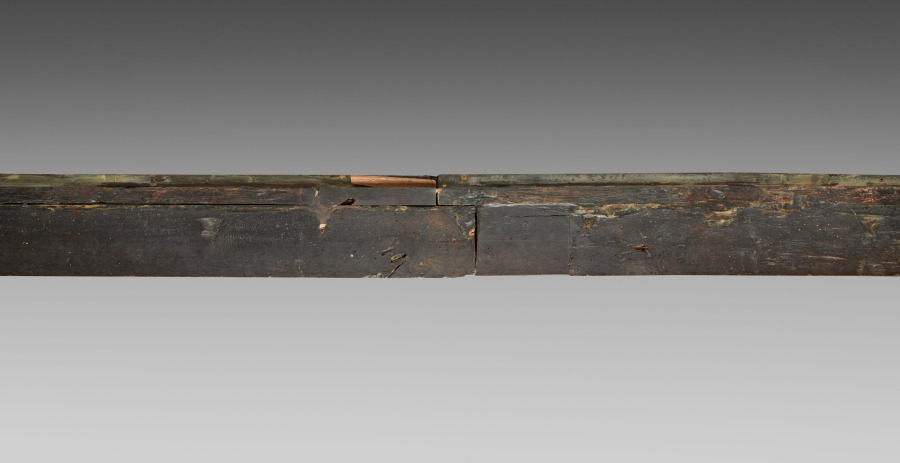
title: Upper Paneling from a Sacristy Armoire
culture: Italy, Florence, late 15th century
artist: attributed to Giuliano da Maiano (Italian, 1432–1490)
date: c. 1460–1475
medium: walnut, inlaid with holly and ebony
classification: Furniture and woodwork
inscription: in four of the five panels is the Medici badge of a jeweled ring wound with a ribbon or bannerole, on which is inscribed the motto "Semper." The frieze in the cornice contains part of a quotation from the Vulgate, Paul's epistle to the Romans, Chapter XI.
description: The imagery on the inset panels is the result of a technique known as intarsia, the skilled inlaying of woods of different colors to create a type of mosaic, popular during the 15th and 16th centuries in Italy for the decoration of paneling and furniture for studies, small rooms, and church sacristies. This large set of five intarsia panels comes from an unknown Florentine church. In its original setting the panels rested upon a row of similarly decorated cupboards (a sacristy armoire) which were used for the storage of liturgical vestments and books. This panel would have therefore been seen at eye level. The central panel depicts the Resurrection of Christ. The two outside panels depict the emblem of Lorenzo de Medici-three plumes encircled by a jeweled ring above a scrolling ribbon containing the Latin word SEMPER (Always). Lorenzo de Medici (1449-92) was the ruler of Florence when this sacristy armoire was constructed and was the likely patron. It seems to be the work of Giuliano da Maiano, an architect and intarsia-maker also responsible for the intarsia in the sacristy of Florence Cathedral.